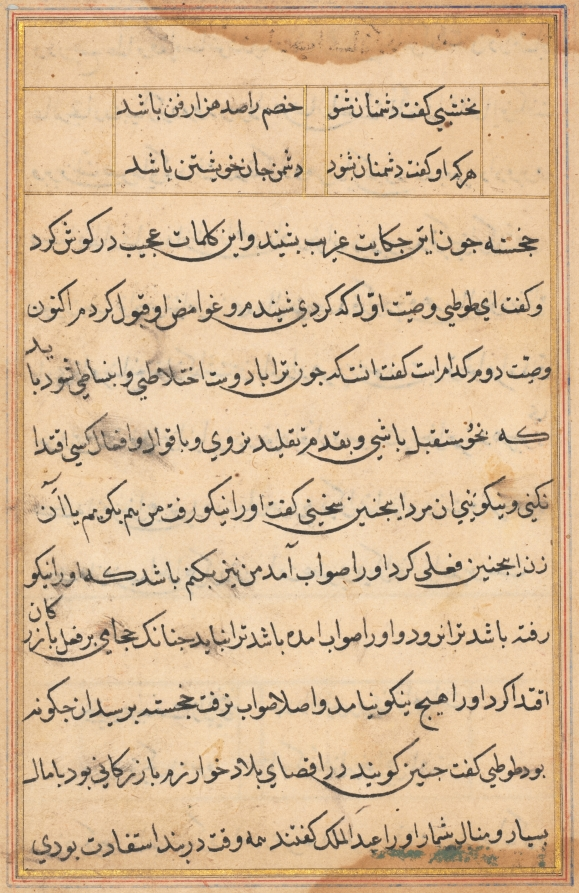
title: Page from Tales of a Parrot (Tuti-nama): text page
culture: Mughal India, court of Akbar (reigned 1556–1605)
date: c. 1560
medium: gum tempera, ink, and gold on paper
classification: Painting